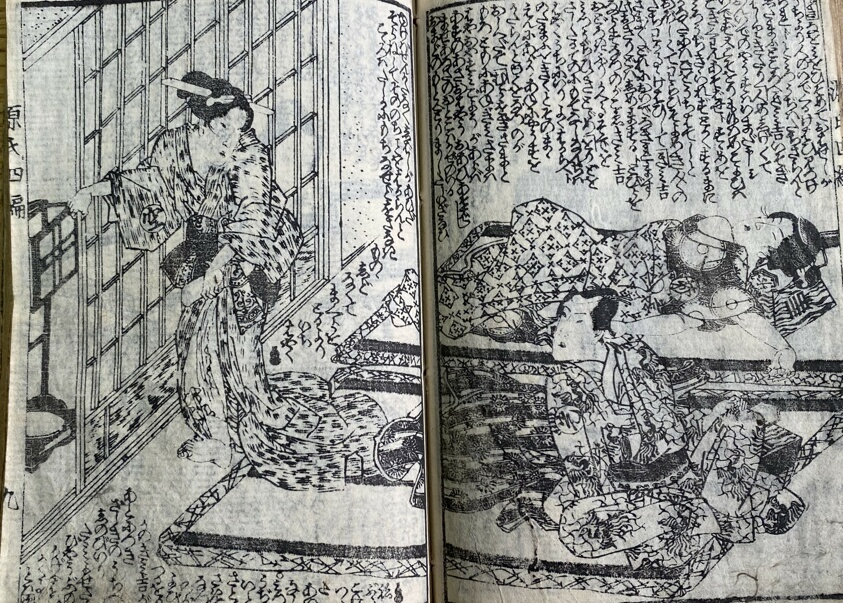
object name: Book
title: Nise Murasaki Inaka Genji (A Fake Murasaki and a Rural Genji)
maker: Ryūtei Tanehiko (Japanese, 1783-1842)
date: 19th century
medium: Woodblock- printed book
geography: Japan